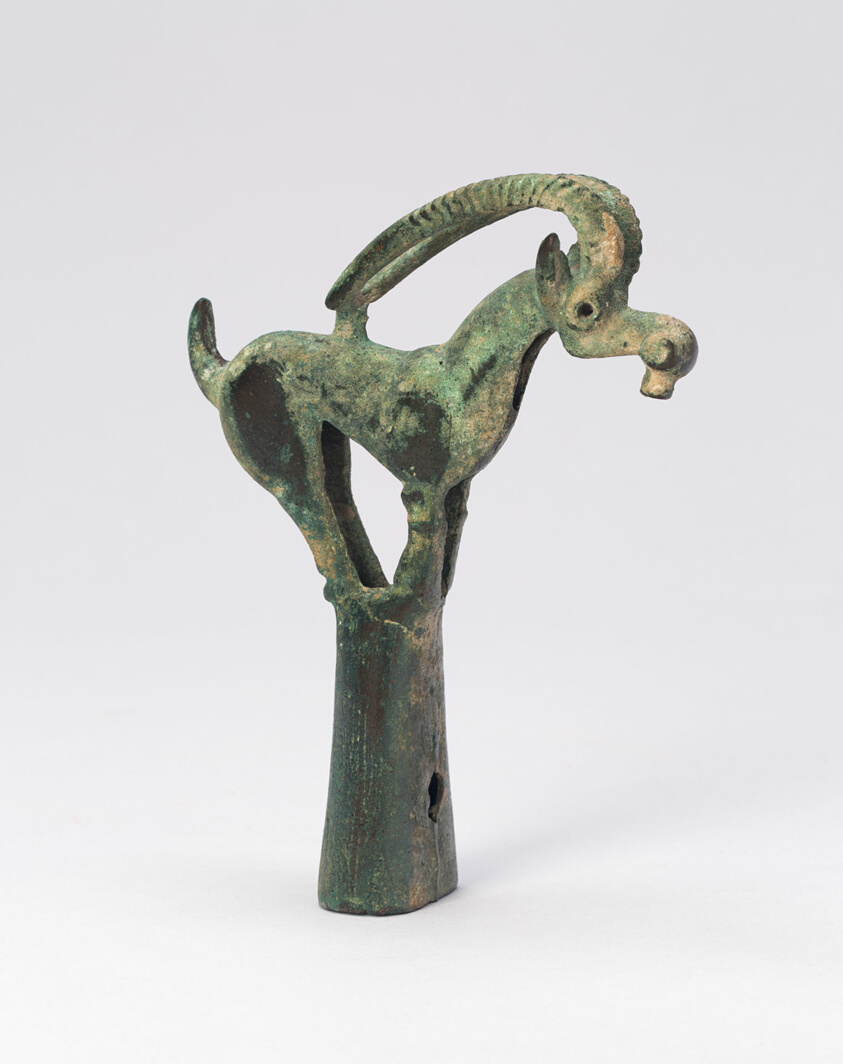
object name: Sculpture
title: Pole Cap with Antelope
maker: Eurasian steppes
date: 6th/4th century B.C.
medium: Bronze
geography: Eurasia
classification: bronze; metal; decorative object/ornament; asian art; sculpture